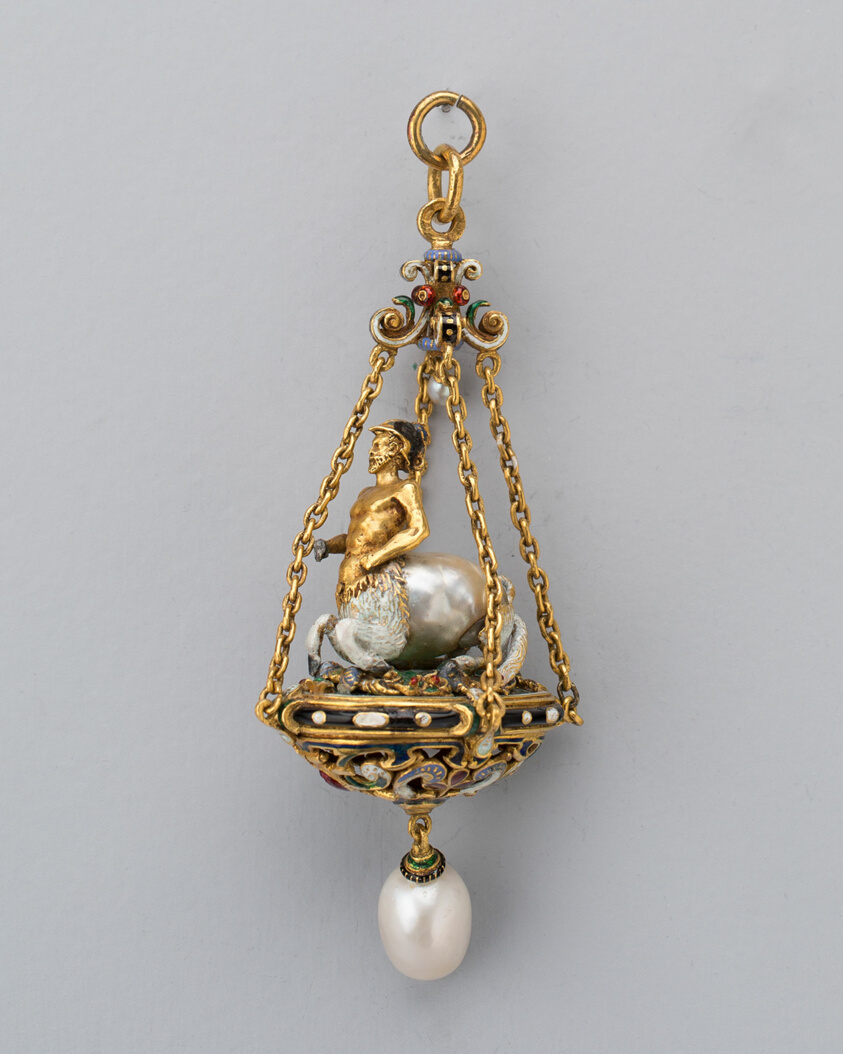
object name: Costume and Accessories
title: Pendant with an Armed Centaur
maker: European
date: 19th century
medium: Gold, pearl, and enamel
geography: Europe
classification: pendant (jewelry); jewelry; european decorative arts; costume